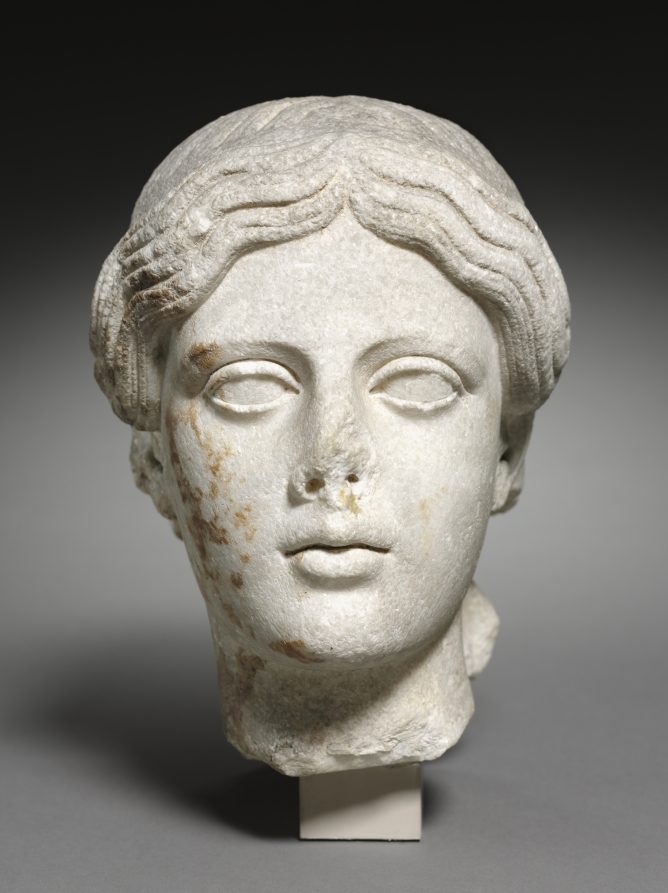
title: Idealized Head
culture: Italy, Roman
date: 50 BCE–100 CE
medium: dolomite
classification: Sculpture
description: This head combines an idealizing style with the serene expression that was characteristic of early Classical sculpture in Greece. Though copies of Greek masterpieces were popular in Rome during the late Republic and early empire, Romans also created many new sculptures that emulated the Classical style, which they felt conveyed a sense of the divine. This statue was probably one such piece, borrowing iconographically and stylistically from various Greek examples.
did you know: This head could represent a woman or goddess, or a youthful god such as Apollo.